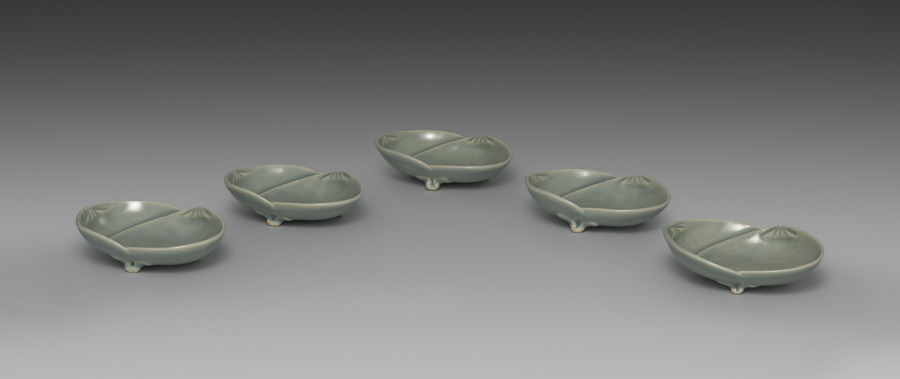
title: Saucers with Matching Shells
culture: Japan, Meiji period (1868–1912)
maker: Seifū Yohei III (Japanese, 1851–1914)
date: 1893–1914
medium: Set of five saucers; porcelain with molded designs and green crackled glaze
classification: Ceramic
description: Yohei III’s main output for his sophisticated clientele was in the form of tea sets and dining sets. He created a range of dishes in green glazes. He often produced in pairs, sets of five, or sets of ten. The set of five dishes with a more complex form is described as having a “water-colored glaze” (mizuiroyū). These are shaped like clam half shells, a reference to a game in which shell halves painted with narrative scenes or a variety of motifs must be matched back together by the players. The dishes have molded details to articulate the shell forms, and the crackling across each shell adds another dimension to the surface. Each dish is set on three small feet, formed by a pinched piece of clay and attached to an unglazed area on the underside of the dish. Curiously, while four of the dishes are stamped with the artist’s mark, one has instead a signature carved into the base.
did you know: The saucers are meant to look like matched halves of clam shells in reference to a once popular game.